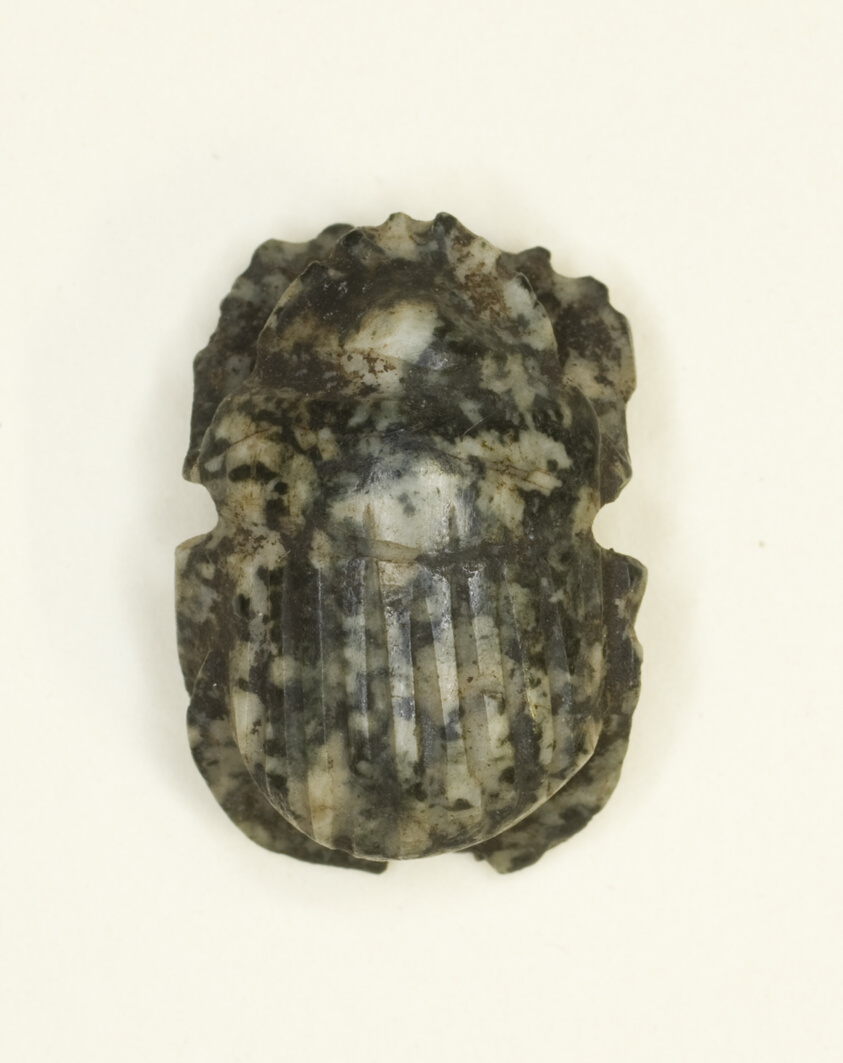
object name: Costume and Accessories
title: Scarab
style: ptolemaic, egyptian, ancient, greco-roman (egyptian)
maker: Egyptian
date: Ptolemaic Period (304–30 BCE)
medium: Stone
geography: Egypt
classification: scarab; stone; amulet; ancient art; costume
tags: scarab beetle, insects